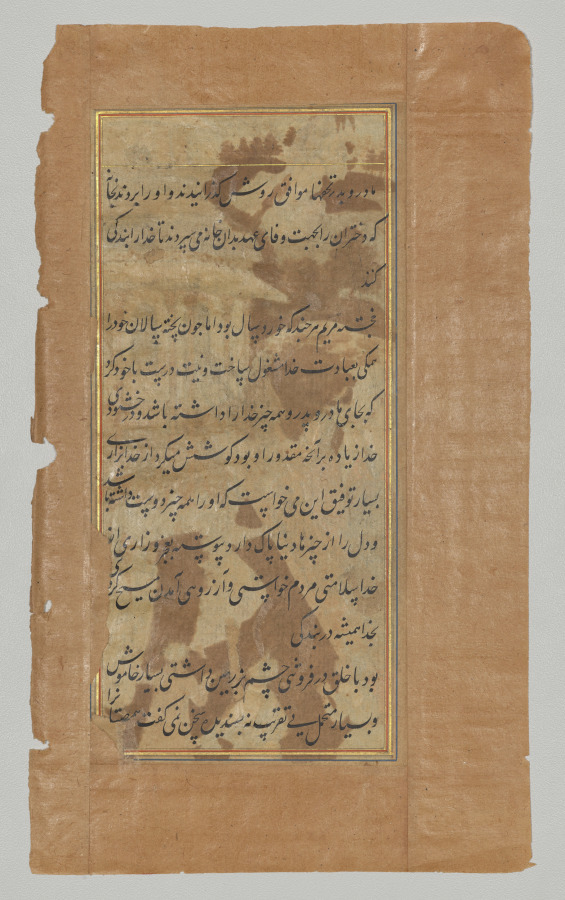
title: Mary ascends the stairs to the temple, from a Mirror of Holiness (Mir’at al-quds) of Father Jerome Xavier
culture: Mughal India, Allahabad, made for Prince Salim (1569–1627)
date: 1602–4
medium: Gum tempera, ink, color, and gold on paper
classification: Manuscript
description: Three-year-old Mary bounds up the stairs of the temple, eager to begin her education. Onlookers gesture in surprise. In the background the rocks have been cleverly shaded to look like faces—a Persian technique of visual double-entendre that the Mughals admired and adopted. This work is the second of the 27 surviving paintings made for this manuscript. The first, a scene of Mary’s birth, is in a private collection in Europe. Mary’s face had been painted with a fragile white paint, which has fallen off. Now only the underdrawing remains visible.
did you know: Mary’s instructor awaits her, book in hand, at the top of a temple of learning.